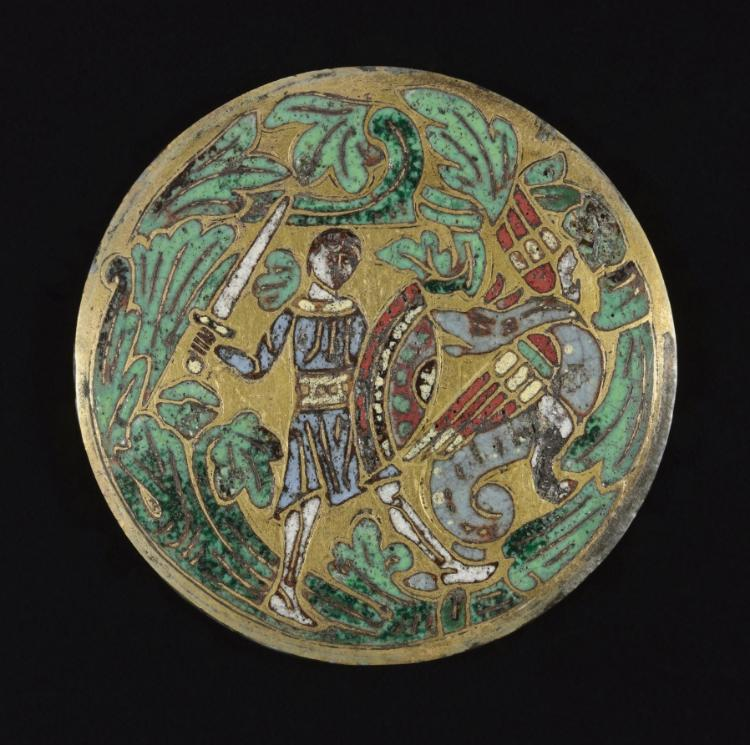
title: Warrior Fighting a Dragon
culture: Anglo-Norman, England or France, Romanesque period, 12th century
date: c. 1170–1180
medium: gilded copper, champlevé enamel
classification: Enamel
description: This gilded copper medallion features an enameled representation of a youthful warrior fighting a winged dragon. As no inscription accompanies the scene, the young hero’s identity remains unknown. It may depict the Arthurian hero Tristan fighting the dragon of Ireland--an epic poem titled Tristan gained popularity at the Plantagenet court of Henry II in England shortly before the medallion was created.